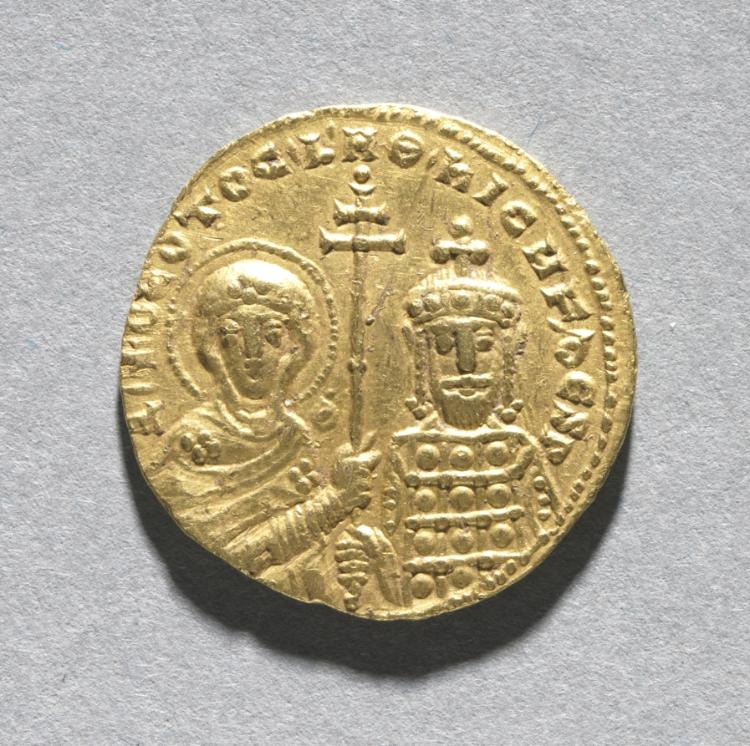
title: Nomisma with Nicephorus II Phocas (reverse)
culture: Byzantium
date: 963–969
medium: gold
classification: Coins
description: The vast number of surviving Byzantine coins attests to the level of trade across the empire. Controlled and supervised by the emperor, the producers of coins took care to represent his authority and reflect his stature. Talented artists were recruited to engrave the dies (molds) used for the striking of coins. Emperors increasingly came to include their heirs and co-emperors on their coinage, as well as other family members or even earlier rulers. Coins were recognized, then as now, as small, portable works of art. With their inscriptions and images, Byzantine coins provide valuable documentation of historical events and a record of the physical appearance of the emperors. The coins shown here include the solidus, the basic gold coin of 24 karats; the tremissis, a gold coin of one-third the weight and value of the solidus; and the nomisma, which in the 10th century replaced the solidus as the standard gold coin.